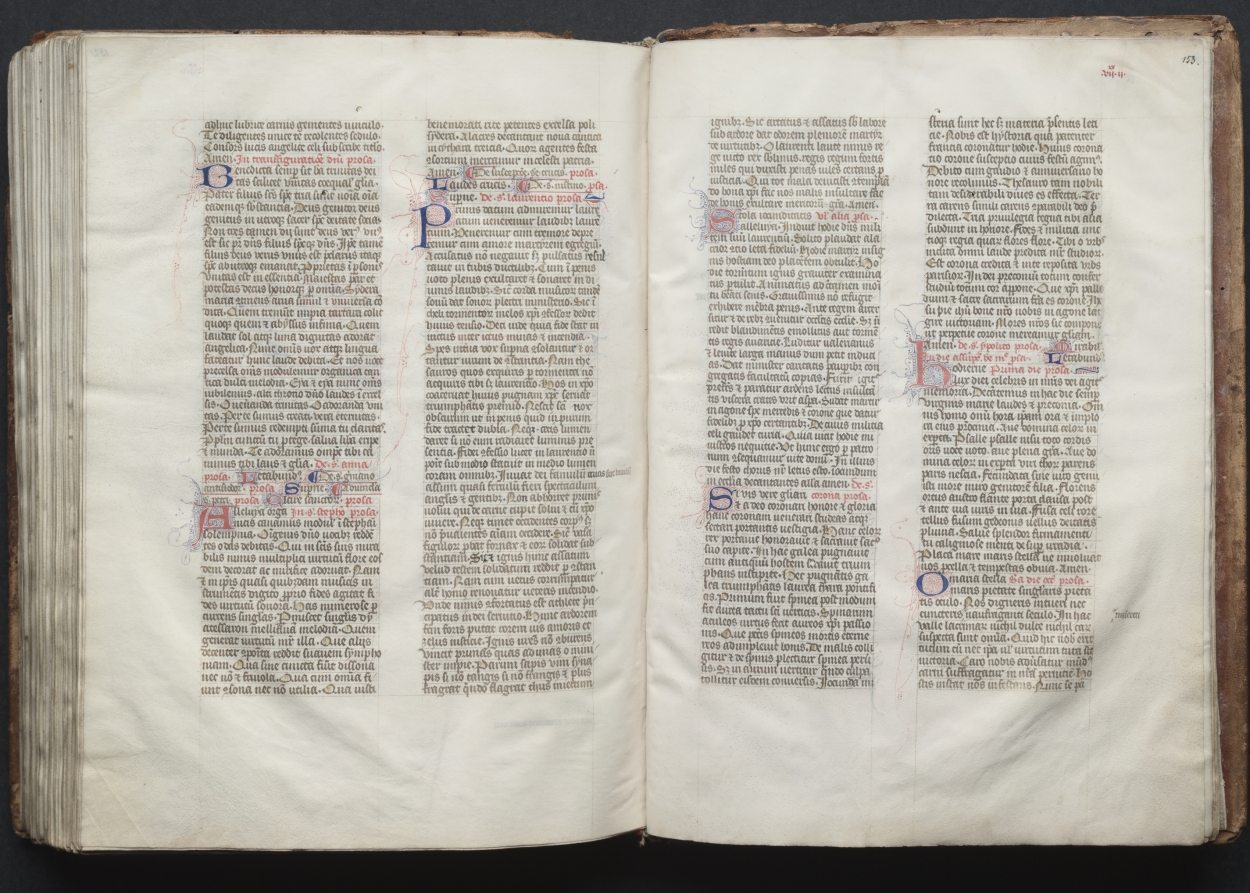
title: The Gotha Missal: Fol. 152v, Text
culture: France, Paris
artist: Master of the Boqueteaux (French)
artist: and Workshop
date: c. 1375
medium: ink, tempera, and gold on vellum; blind-tooled leather binding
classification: Bound Volume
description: The style and quality of this manuscript's decoration is typical of deluxe Parisian books made for aristocratic or royal patrons. Most of the book's decoration appears to be the work of the Master of the Boqueteaux, an artist active at the court of King Charles V (died 1380). His style was apparently shared by a number of book illuminators working in and around Paris. It is very possible that the Gotha Missal belonged to Charles V, but is not provable because the manuscript has no royal portraits and lacks a colophon. Given the book's magnificent decoration, however, it would seem that it was produced for a Valois prince, if not for the king himself. The manuscript receives its name from the German dukes of Gotha, its later owners.